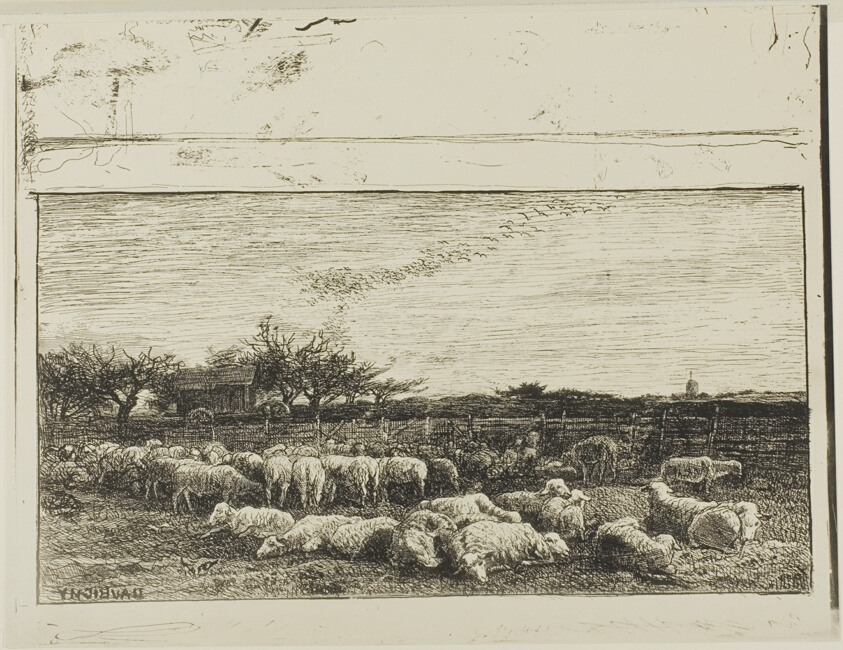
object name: Print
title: The Large Sheepfold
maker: Charles François Daubigny (French, 1817-1878)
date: 1862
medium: Cliché-verre on ivory photographic paper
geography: France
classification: cliché-verre; print; prints and drawing